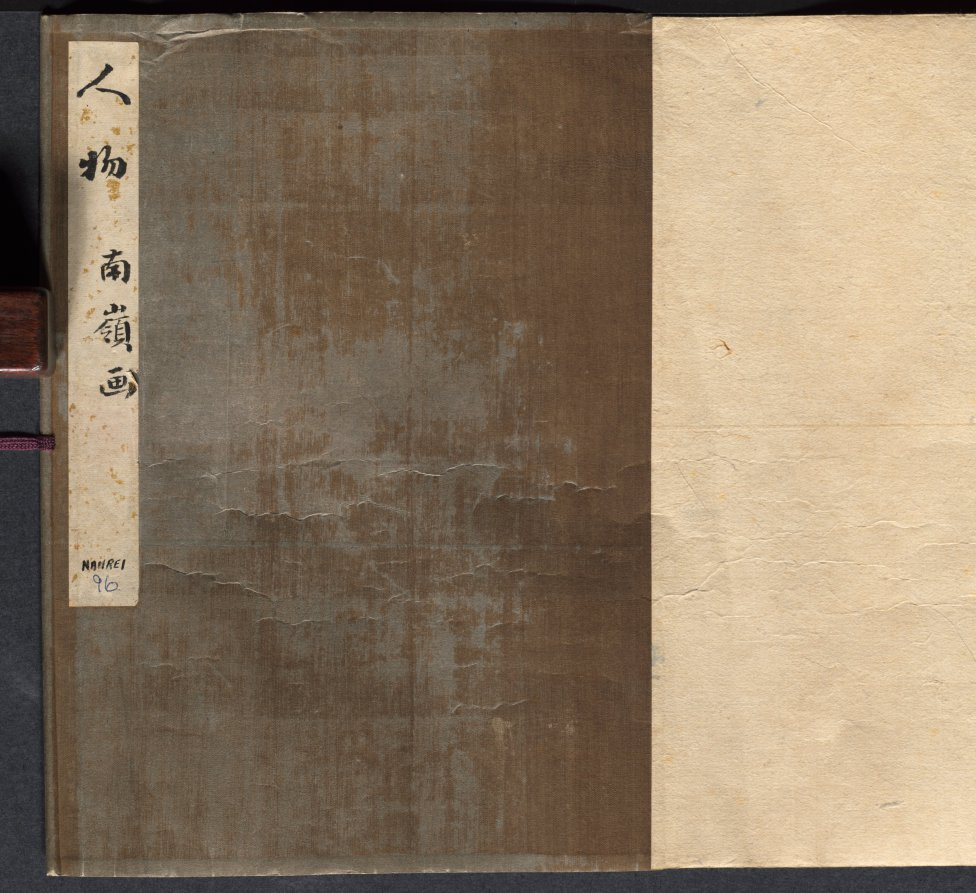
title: Festival Scenes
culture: Japan, Edo period (1615–1868)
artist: Suzuki Nanrei (Japanese, 1775–1844)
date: c. 1795–1844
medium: handscroll; ink and color on paper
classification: Painting